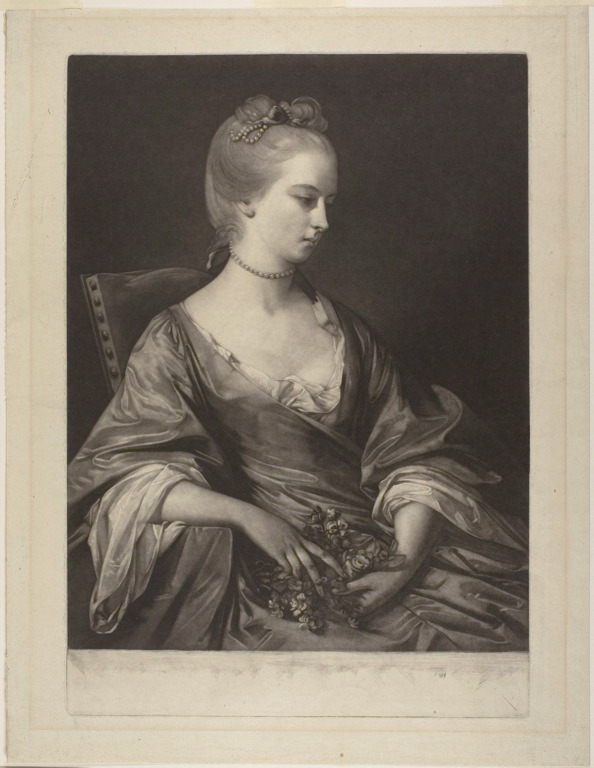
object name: Print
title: Esther Jacobs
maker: John Spilsbury (English, c. 1730-1795); after Sir Joshua Reynolds (English, 1723-1792)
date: c. 1760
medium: Mezzotint on paper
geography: England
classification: mezzotint; print; prints and drawing